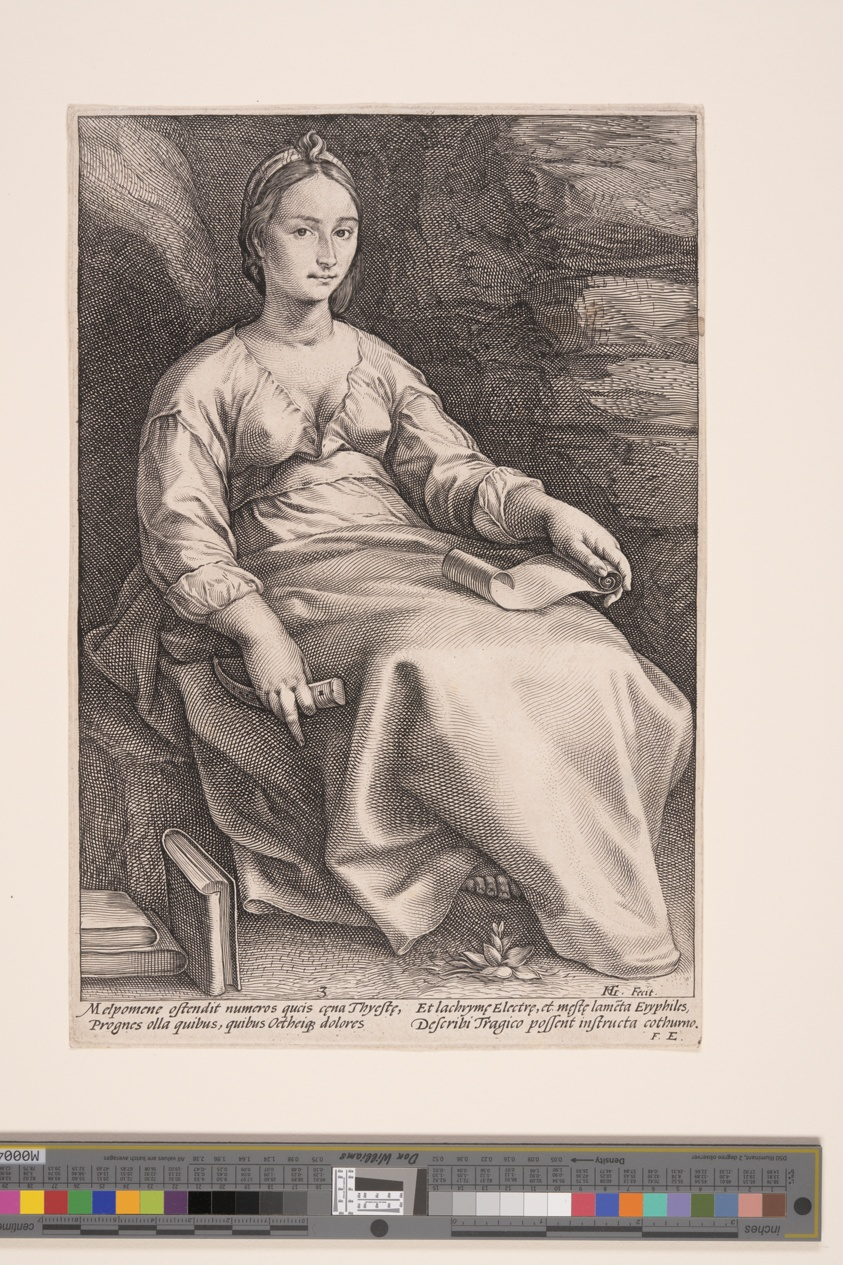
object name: Print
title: Melpomene, The Muse of Tragedy, from The Nine Muses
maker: Hendrick Goltzius (Dutch, 1558–1617)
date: 1592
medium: Engraving on laid paper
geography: Netherlands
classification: print; engraving; paper; prints and drawing